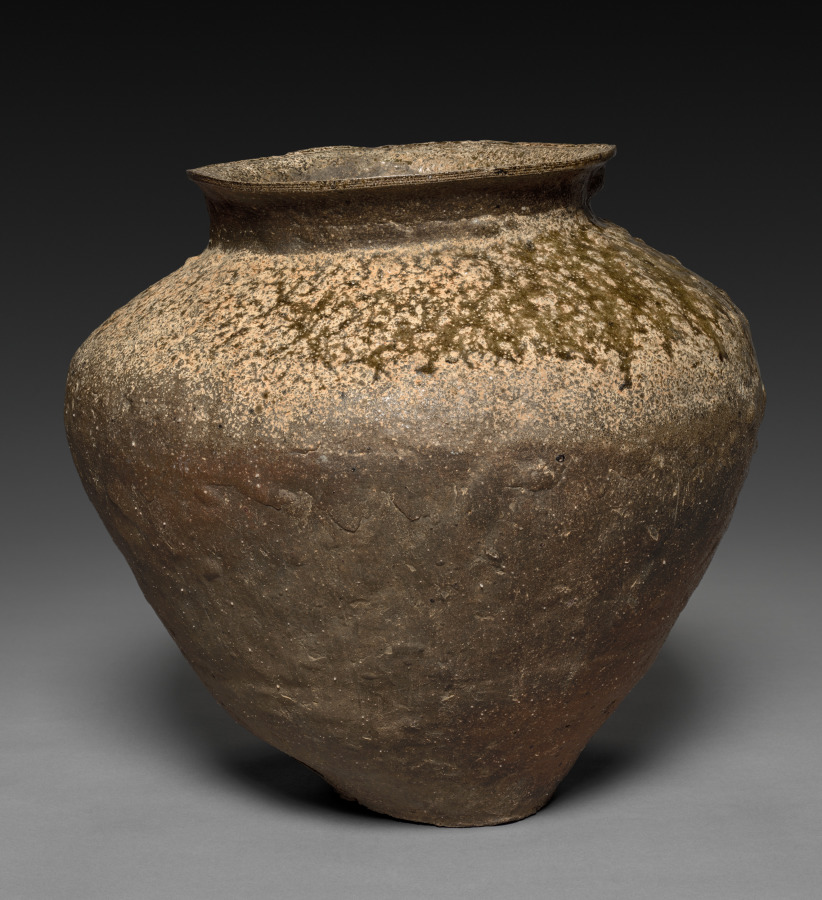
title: Storage Jar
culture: Japan, Kamakura period (1185–1333)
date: late 1100s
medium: Stoneware with natural ash glaze (Tokoname ware)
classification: Ceramic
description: Tokoname, located on Ise Bay in present-day Aichi prefecture on Japan’s main island, Honshu, was the largest center of ceramic production in medieval Japan. It had been an active center of ceramic production since the Heian period (794–1185). Wide-mouthed jars like this one are called kame, and were favored for use in tea practice.